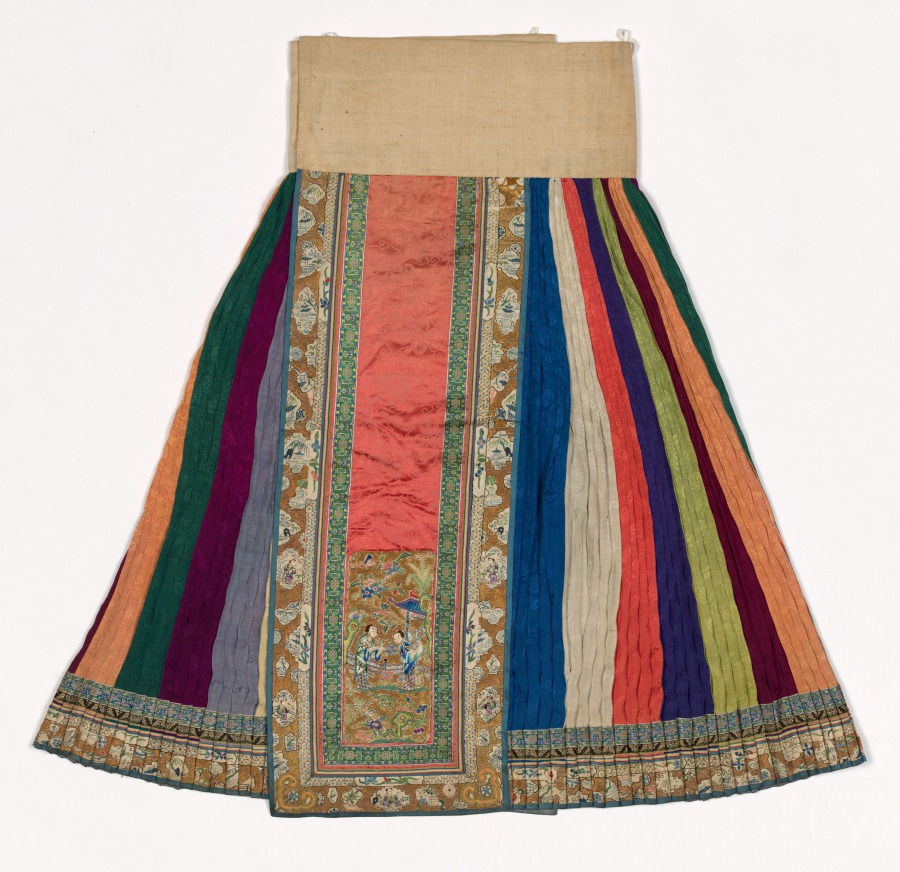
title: Embroidered Skirt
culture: China, Qing dynasty (1644–1911)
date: early 1900s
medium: silk with metal thread embroidery; plain weave cotton ? waistband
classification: Garment